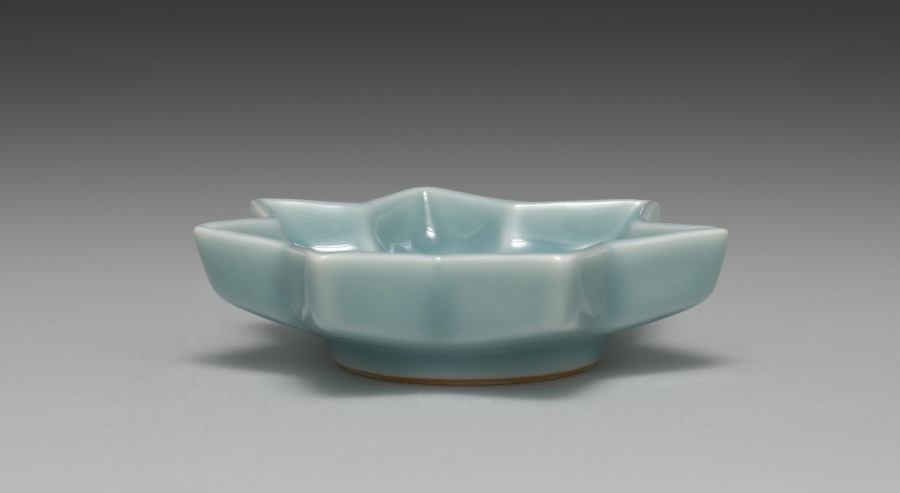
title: Saucer from Maple Leaf-Shaped Saucers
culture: Japan, Meiji period (1868–1912)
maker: Seifū Yohei III (Japanese, 1851–1914)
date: 1893–1914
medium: One of five dishes from a set of ten; porcelain with blue glaze and molded design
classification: Ceramic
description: These maple leaf–shaped saucers, like Yohei III's five shell saucers CMA 2022.188, have a long, horizontal box with a separate compartment for each piece. Now a set of five, these dishes were originally a set of ten, stored in two boxes of five each. From their housings, which accommodate differing numbers of objects, one can hypothesize that while some items created by the Seifu studio were intended to be acquired in larger sets, and thus were perhaps made to order, others, like these, may have been items to be purchased of the shelf in set quantities that allowed clients flexibility in scale. The box for these five saucers describes them as “heavenly blue[–glazed] porcelain” (tenseiji). The veins of the leaves are slightly raised in the clay so that the glaze pools around them and they stand out as white where the glaze thins. There are longer lines at the points of the leaves and shorter ones following the wall of each indentation so that the design has both a horizontal and a subtle vertical dimension.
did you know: These saucers shaped like maple leaves show Seifū Yohei III’s “heavenly blue glaze.”